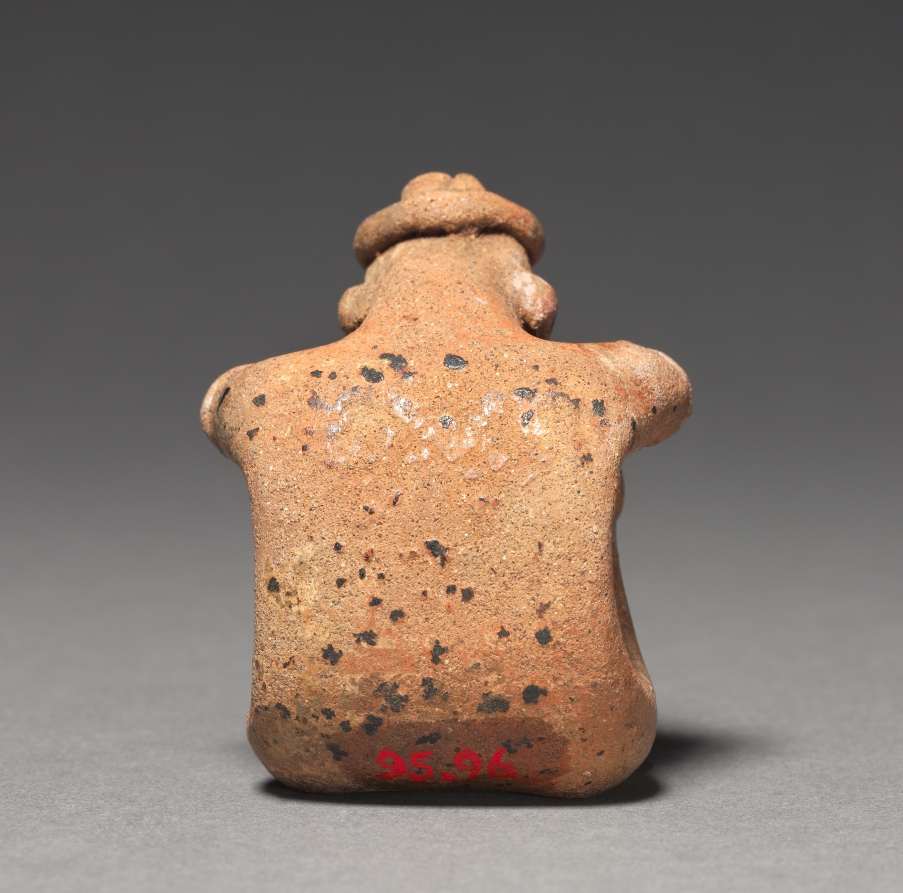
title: Seated Male Figurine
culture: Mesoamerica, Veracruz, Remojadas Style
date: 500–900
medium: ceramic, pigment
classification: Sculpture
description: Clay figurines were the earliest and most common art form in Mexico and other countries in the ancient Mesoamerican (Middle American) culture region. Made first by hand and later with molds, most figurines belong to the traditions of commoners, such as farmers, rather than those of elites.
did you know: Clay figurines were the earliest, most common art form in the ancient Mesoamerican culture region.